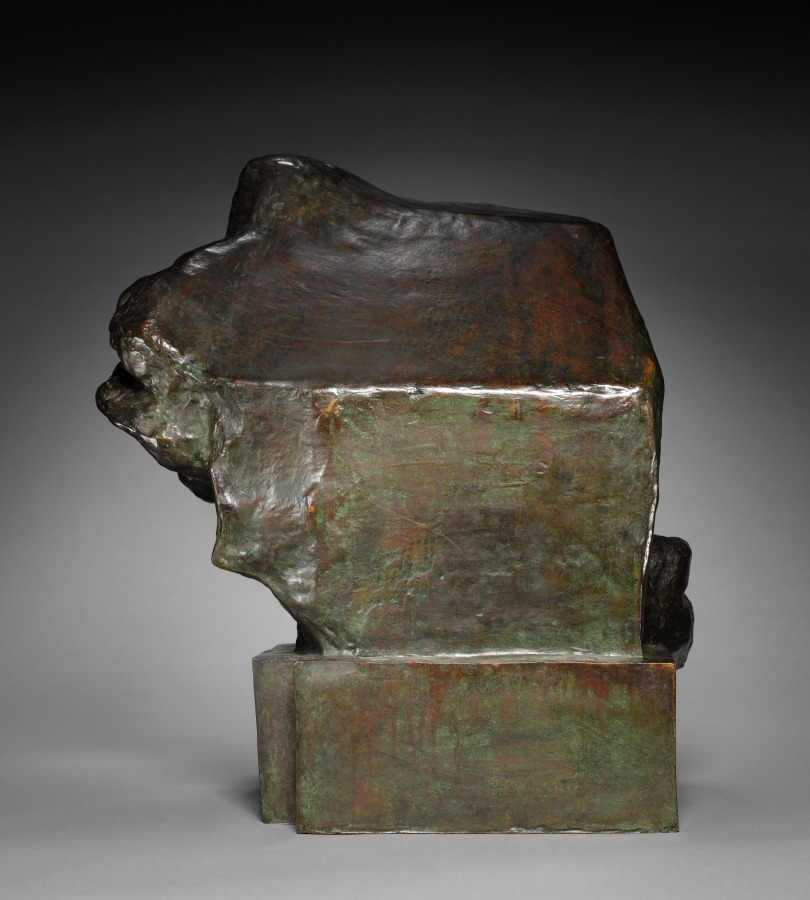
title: Head of Beethoven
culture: France, 19th century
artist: Emile Antoine Bourdelle (French, 1861–1929)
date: 1891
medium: bronze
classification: Sculpture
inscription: Signed left side: "Bourdelle / Sculpt."; inscribed right side: "FONRIENATLE DES BRONZES / J PETERMANN: ST GILLES BRUXELLES"; inscribed on front: "Mon domaine c'est l'air / quand le vent, se leve / mon âme tourbillonne / Beethoven"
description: A pioneer of modern sculpture, Antoine Bourdelle studied at the École des Beaux-Arts in Paris and worked as an assistant to Augustin Rodin, who greatly admired the younger artist’s work. In 1888 Bourdelle produced the first of a series of sculptural portraits of Ludwig van Beethoven, in which the artist orchestrated powerful billowing shapes to convey the creative spirit or genius of the composer. The artist inscribed a quote from Beethoven in the lower left: “My domain is the air; when the wind rises my soul swirls.”